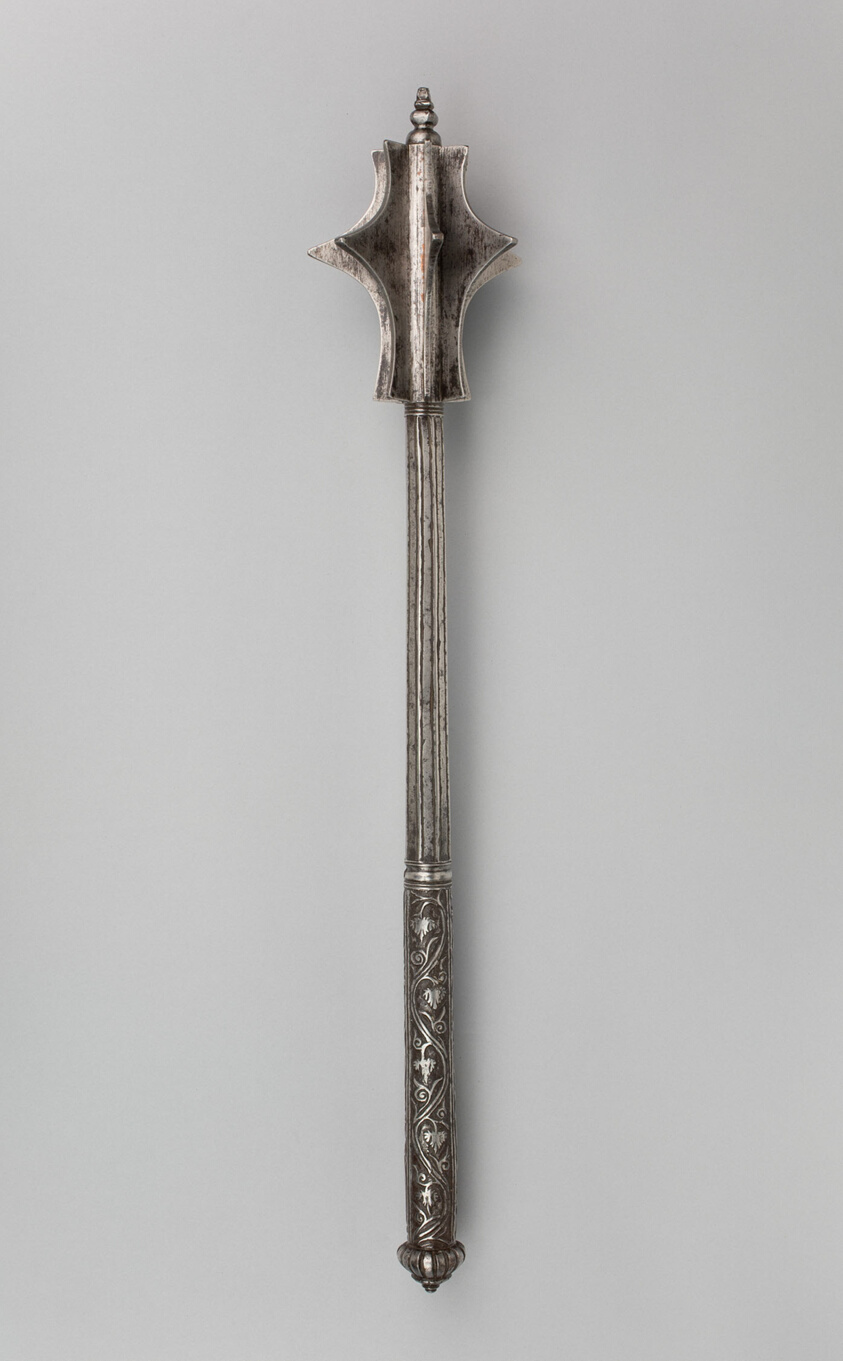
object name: Arms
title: Mace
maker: German, possibly Italian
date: c. 1540/50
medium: Iron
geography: Germany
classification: shafted weapon; arms; arms and armor